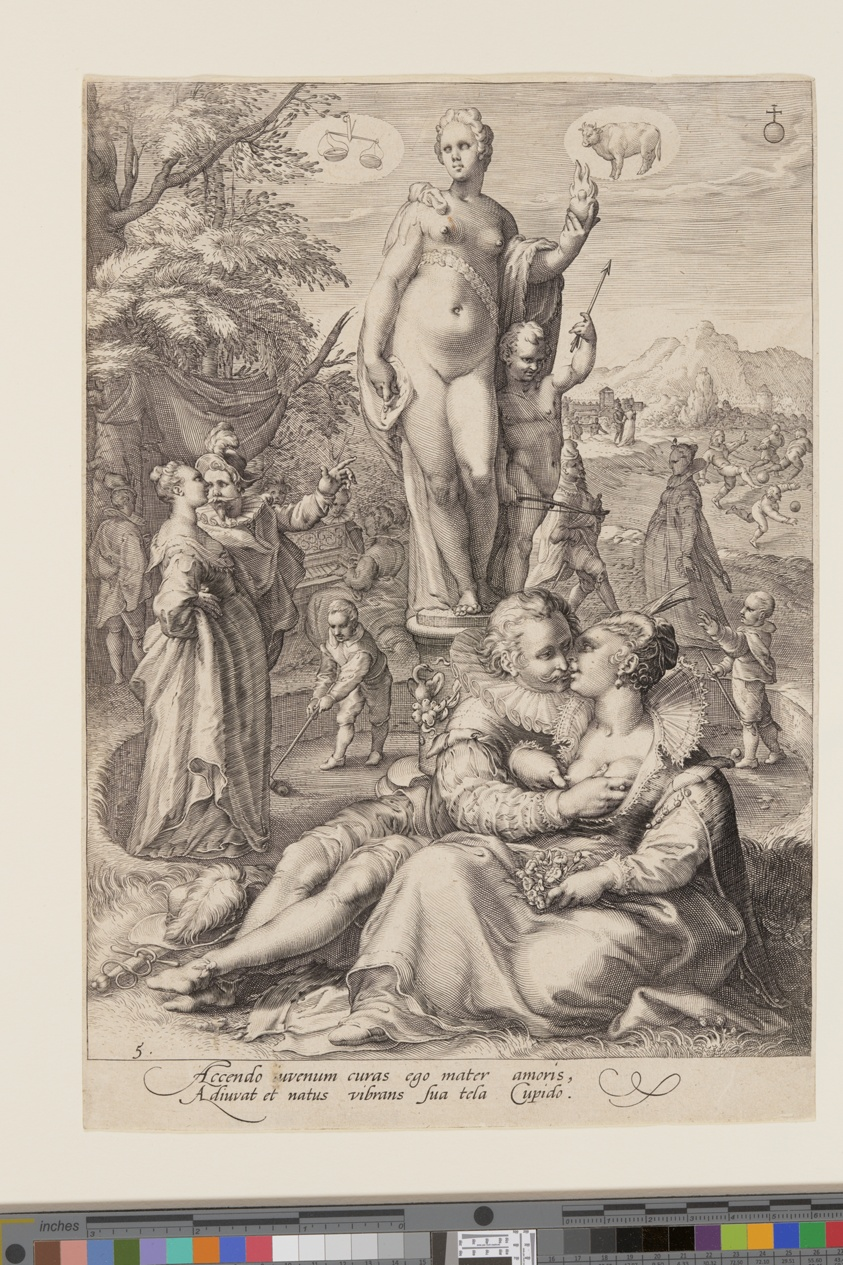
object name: Print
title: Venus Presiding over the Realm of Love, from Seven Planetary Gods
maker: Jan Saenredam (Dutch, 1565–1607); after Hendrick Goltzius (Dutch, 1558–1617)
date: 1596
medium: Engraving on ivory laid paper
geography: Netherlands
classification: engraving; paper; print; prints and drawing